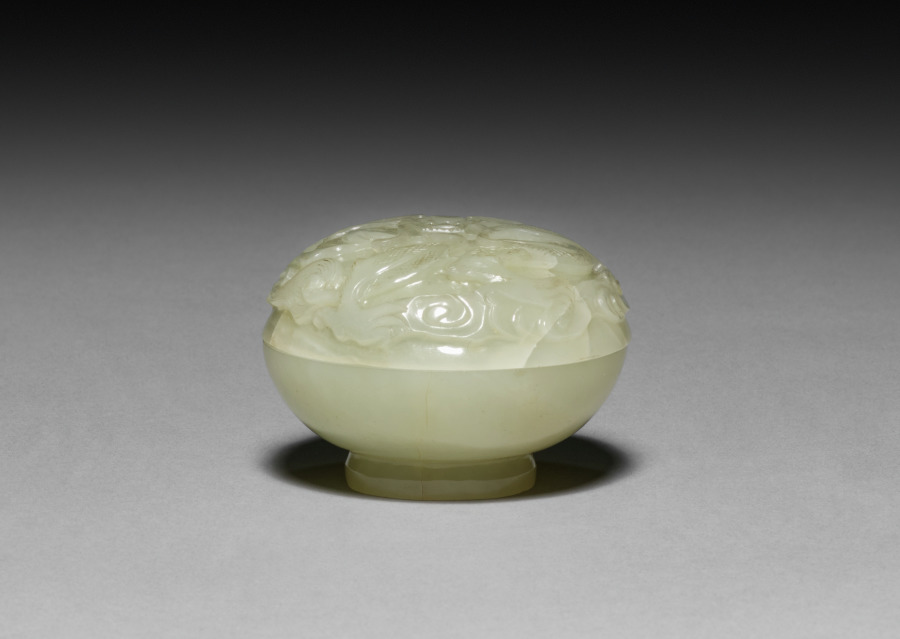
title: Box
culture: China, Qing dynasty (1644-1911)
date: 1644–1911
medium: jade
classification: Jade